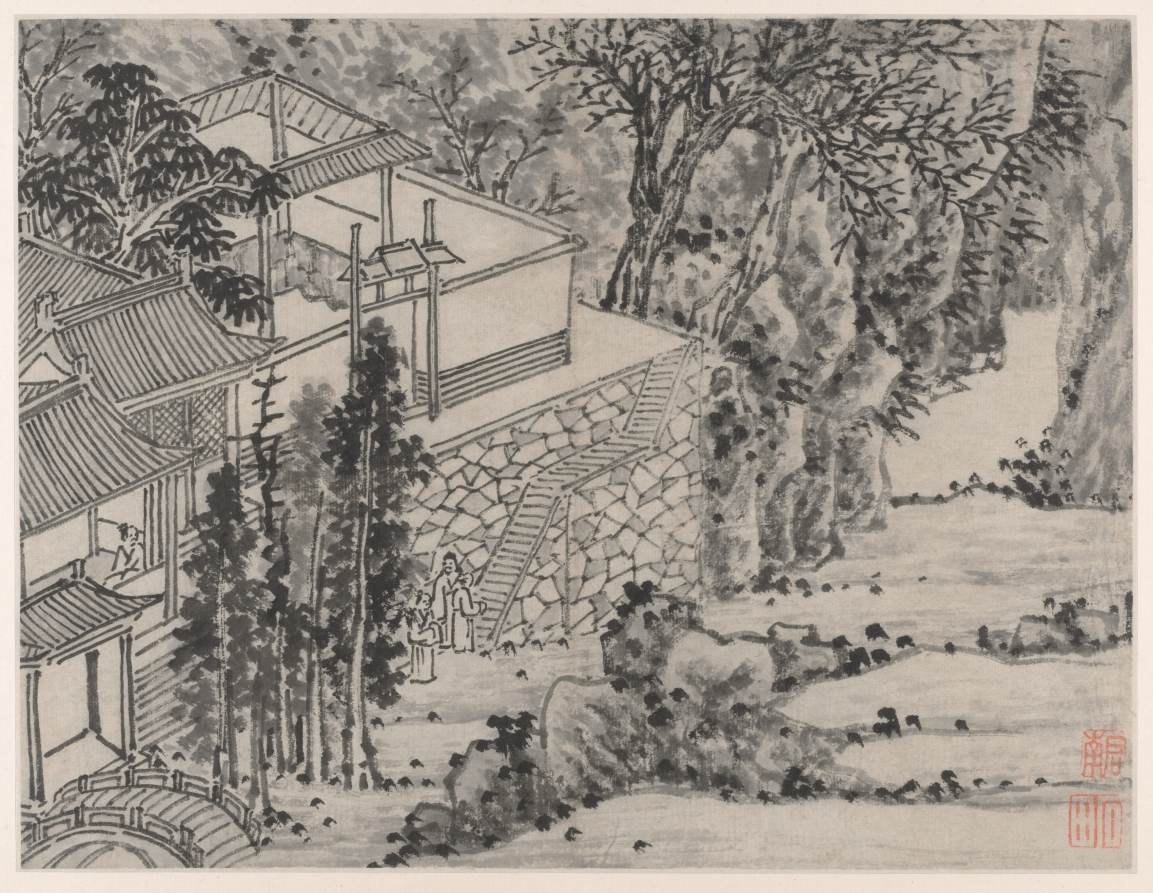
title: The Enlightened Stone Retreat, from Twelve Views of Tiger Hill, Suzhou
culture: China, Ming dynasty (1368–1644)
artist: Shen Zhou (Chinese, 1427–1509)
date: after 1490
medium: Album leaf; ink on paper or ink and slight color on paper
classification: Painting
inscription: [印] 启南; 石田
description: Views of Tiger Hill depicts a historic site a few miles northwest of Suzhou. The scenes simulate a visit from arriving by boat at the foot of the mountain to climbing to Cloudy Cliff Monastery. Representations of the artist’s mature style, Shen Zhou included views in subtle colors in the suite of monochrome scenes. A Suzhou native, Shen Zhou was supported by family wealth and rejected an official career in favor of life as a retired scholar. Turning to painting in midlife, he is regarded as the founder of the Wu School of painting, with its center in Suzhou.